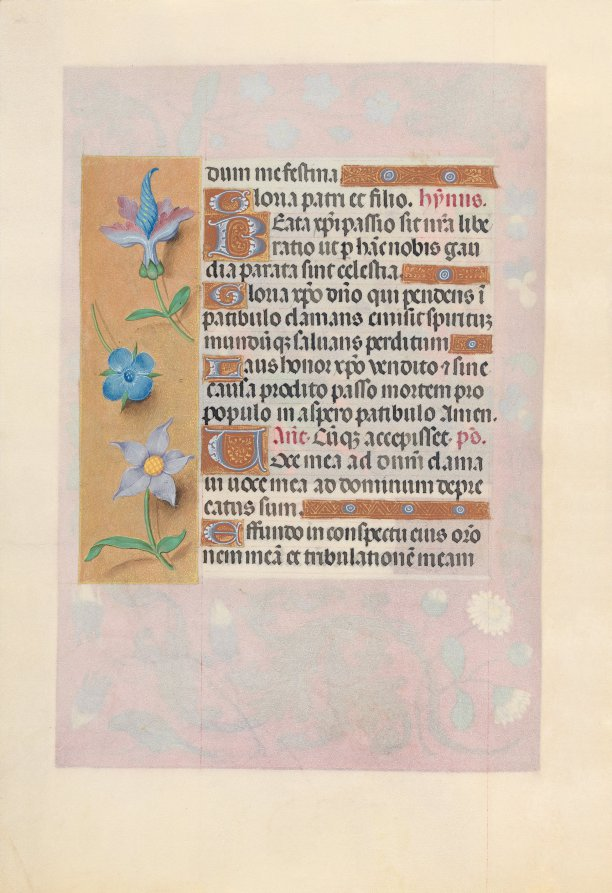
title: Hours of Queen Isabella the Catholic, Queen of Spain: Fol. 69v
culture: Flanders, Ghent and Bruges, late 15th century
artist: Master of the First Prayerbook of Maximillian (Flemish, c. 1444–1519)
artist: and Associates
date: c. 1500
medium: ink, tempera, and gold on vellum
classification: Bound Volume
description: This manuscript was illuminated by a circle of at least five highly organized manuscript painters active in the Flemish cities of Ghent and Bruges. The principal illuminator was Alexander Bening, who painted the majority of the book's miniatures. Manuscripts produced by this circle of artists are renowned for the decoration of their borders, which typically feature a rich variety of realistically-painted flowers, birds, and butterflies. This prayer book, called a book of hours, was intended not for a cleric, but for the private devotions of a lay person-in this case, Isabella the Catholic, Queen of Spain (1451-1504). Isabella's coat of arms embellishes the book's frontispiece. It is unlikely that the book was commissioned by the Queen herself; rather, she probably received it as a diplomatic gift from someone courting her patronage, perhaps Cardinal Francisco Jimenez de Cisneros. A Franciscan friar, Jimenez was dependent upon Isabella for his advancement, first to the post of Queen's confessor in 1492, and then to Archbishop of Toledo in 1495.